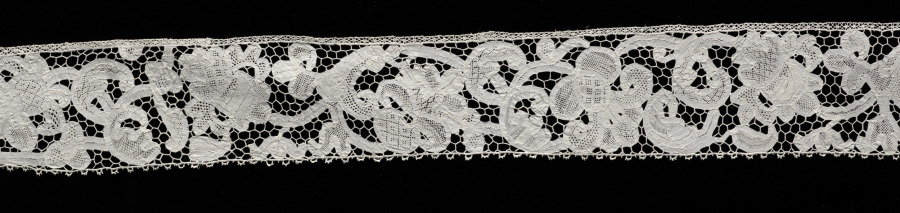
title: Lace Edging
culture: Italy, Genoa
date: 1700s–1800s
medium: Linen: needle lace and bobbin lace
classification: Lace